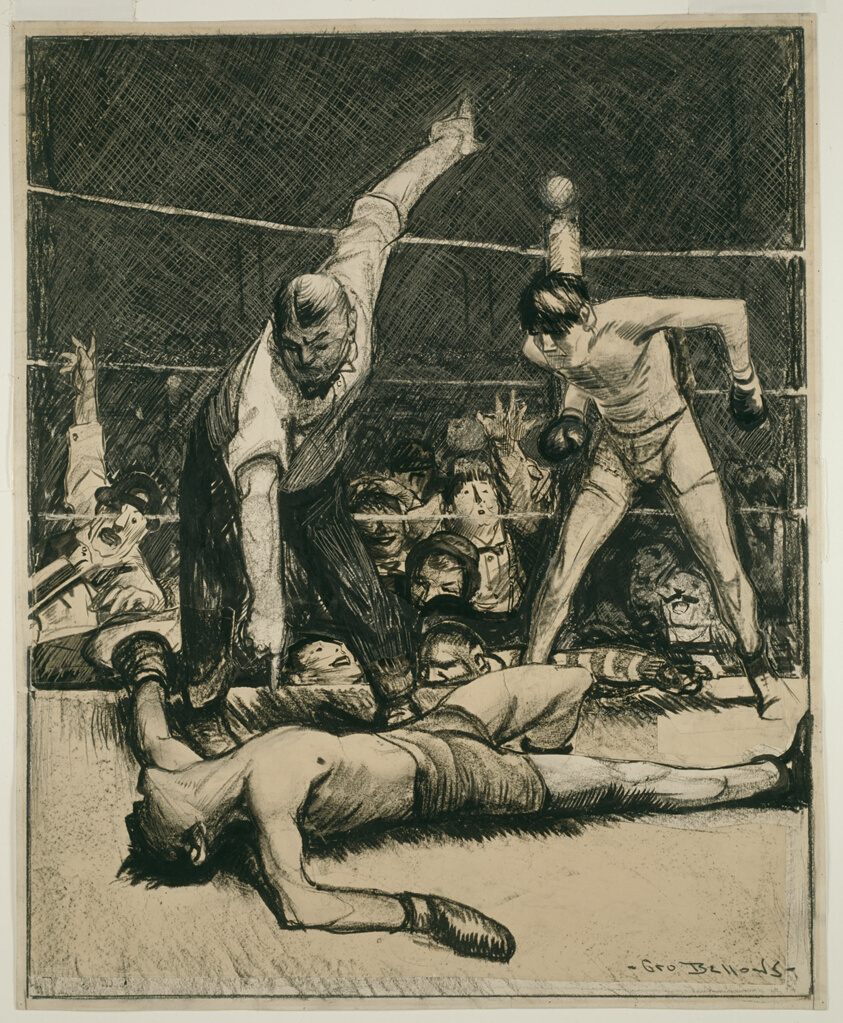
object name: Drawing and Watercolor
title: Counted Out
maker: George Wesley Bellows (American, 1882-1925)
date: 1912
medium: Lithographic crayon and charcoal, with brush and black ink, scraping and smudging, over touches of graphite on cut and pieced cream wove papers, laid down on ivory wove paper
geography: United States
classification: charcoal; drawings (visual works); prints and drawing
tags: boxers, people, prints and drawings